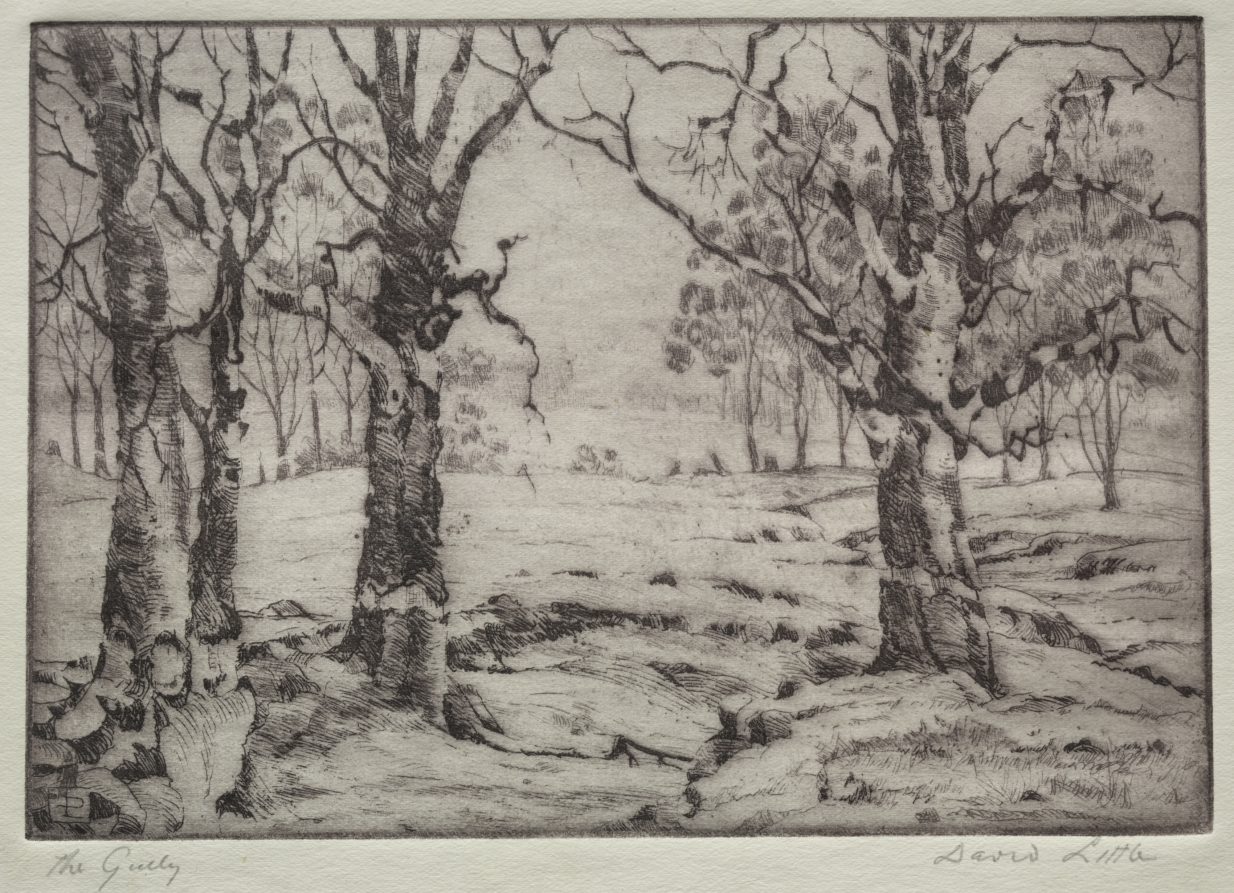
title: The Gully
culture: England, 20th century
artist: David Little (Australian, 1893–1951)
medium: etching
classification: Print